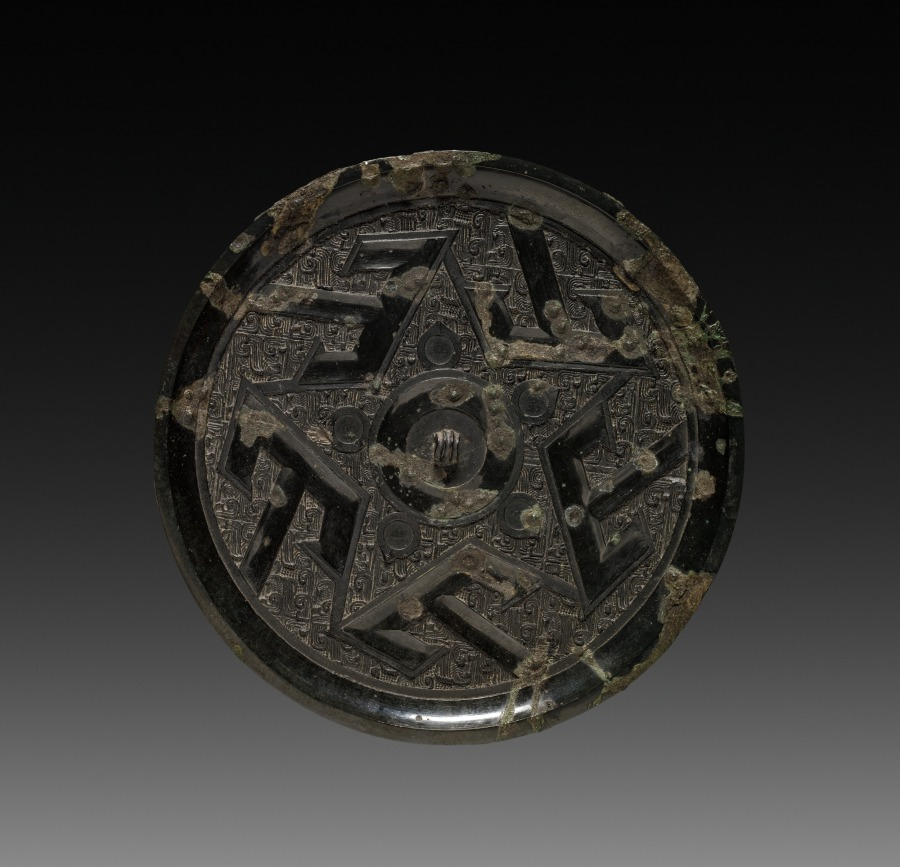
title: Mirror with 'Shan' (Mountain) Pattern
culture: China, probably State of Chu, possibly Hunan province, Eastern Zhou dynasty (770–256 BCE), Warring States period (475–221 BCE)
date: 200s BCE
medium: bronze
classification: Metalwork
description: Chinese mirror-casting achieved new elegance and precision with the technical development of stamped clay molds over which molten bronze was poured. A small rectangular unit of design was repeatedly stamped to create this background of curls and granulation, which resembles feather-covered textiles known from early tomb finds. The dominant pattern of slanting "T," pressed down upon the mold after the overall background stamps, corresponds to the modern Chinese character for shan (山 or mountain). Whether the pattern was symbolic or decorative during the Zhou Dynasty is unknown. The site of manufacture is probably south China, since many mirrors of this type have been excavated from tombs in that area.